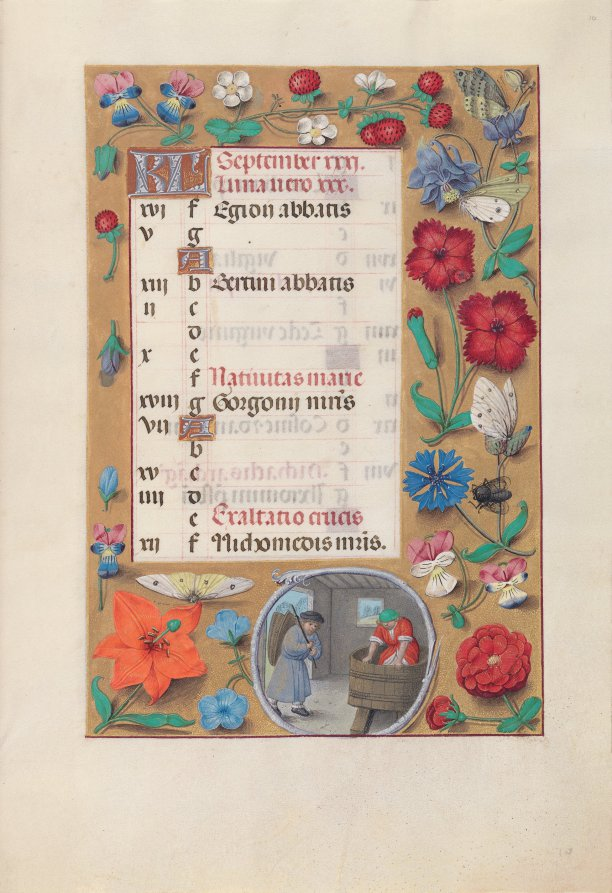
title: Hours of Queen Isabella the Catholic, Queen of Spain: Fol. 10r, September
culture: Flanders, Ghent and Bruges, late 15th century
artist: Master of the First Prayerbook of Maximillian (Flemish, c. 1444–1519)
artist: and Associates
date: c. 1500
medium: ink, tempera, and gold on vellum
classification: Bound Volume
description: This manuscript was illuminated by a circle of at least five highly organized manuscript painters active in the Flemish cities of Ghent and Bruges. The principal illuminator was Alexander Bening, who painted the majority of the book's miniatures. Manuscripts produced by this circle of artists are renowned for the decoration of their borders, which typically feature a rich variety of realistically-painted flowers, birds, and butterflies. This prayer book, called a book of hours, was intended not for a cleric, but for the private devotions of a lay person-in this case, Isabella the Catholic, Queen of Spain (1451-1504). Isabella's coat of arms embellishes the book's frontispiece. It is unlikely that the book was commissioned by the Queen herself; rather, she probably received it as a diplomatic gift from someone courting her patronage, perhaps Cardinal Francisco Jimenez de Cisneros. A Franciscan friar, Jimenez was dependent upon Isabella for his advancement, first to the post of Queen's confessor in 1492, and then to Archbishop of Toledo in 1495.